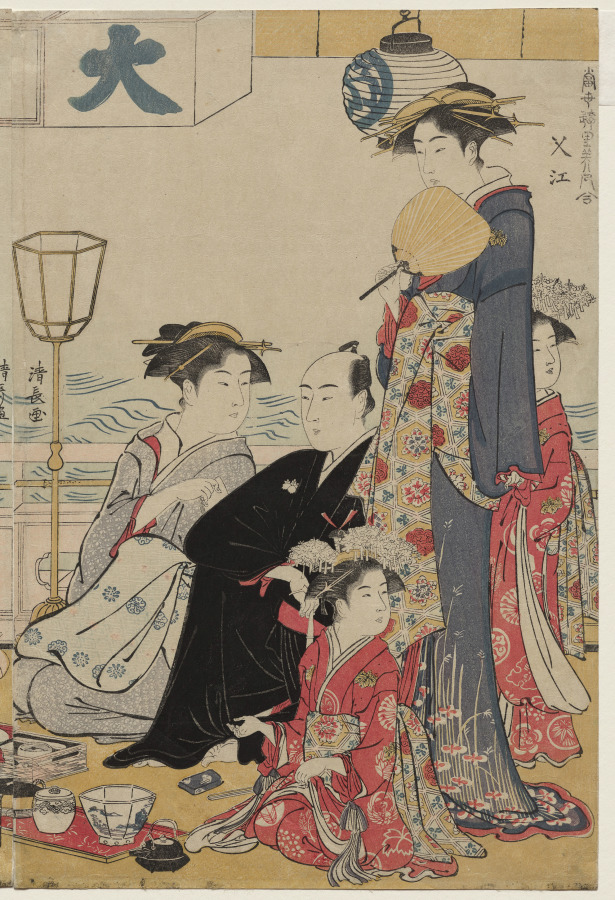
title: Entertainment on a Balcony by the Water at Nakasu, from the series, A Collection of Beautiful Modern Women of the Pleasure Quarters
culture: Japan, Edo period (1615–1868)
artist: Torii Kiyonaga (Japanese, 1752–1815)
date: 1783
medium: diptych: color woodblock print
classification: Print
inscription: Signature: Kiyonaga ga